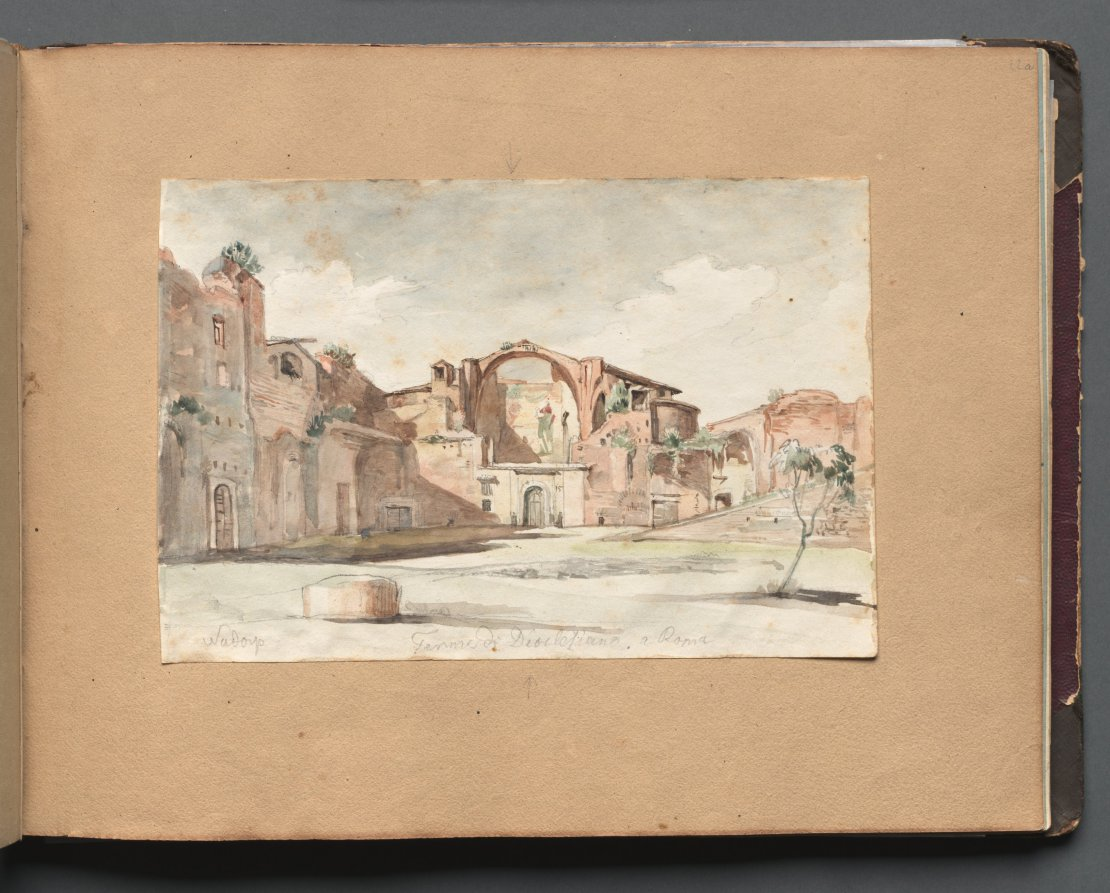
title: Album with Views of Rome and Surroundings, Landscape Studies, page 22a: "Terme di Diocleziano, Rome"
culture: Germany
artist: Franz Johann Heinrich Nadorp (German, 1794–1876)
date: c. 1830s-70s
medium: watercolor with graphite on white paper laid down on brown paper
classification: Bound Volume